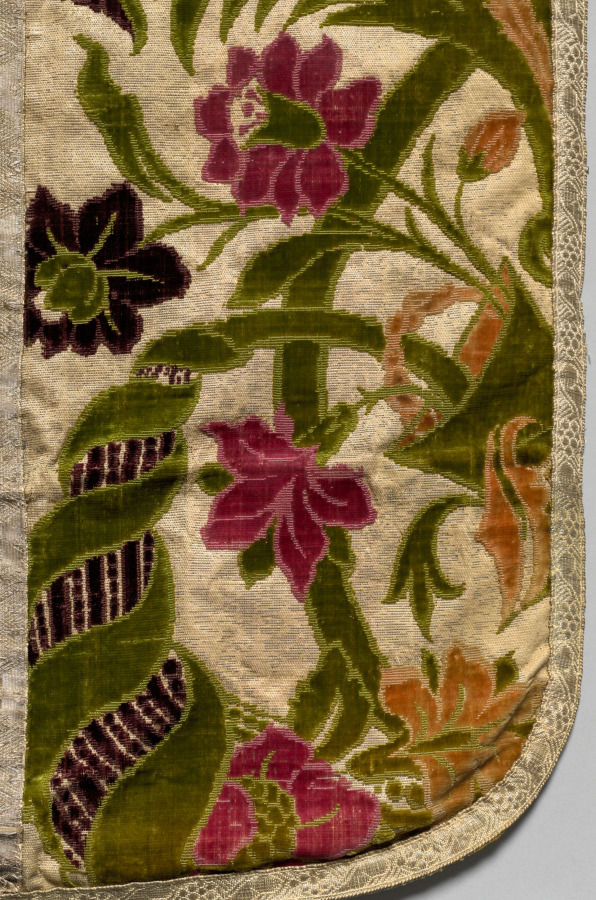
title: Chasuble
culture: Italy, Genoa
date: c 1600–1700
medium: Silk and gilt metal threads, woven; cut and uncut velvet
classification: Velvet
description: This sumptuous polychrome velvet displays a central vase with abundant flora and exotic leaves flanking curving blossoming fronds on a gilt-metal thread ground. The pattern was created with five colors of cut and uncut (loops) velvet pile. Only the pile warps for the lush green velvet occur across the entire cloth, while each additional color appears in vertical stripes—crimson, peach, rose, and purple. These widely acclaimed velvets from Genoa were the most colorful woven in Europe. Both the long stole and the shorter maniple are insignia of the office of deacons, priests, and the higher clergy. The stole was worn under a chasuble according to the office and the maniple was hung on the left forearm. The burse is a stiff receptacle in which the folded corporal, a white linen cloth on which the sacred bread and chalice are placed during the Mass, is carried to and from the altar. The upper fabric matches the chasuble, the bottom is a plain silk, and the interior has an obligatory linen lining.